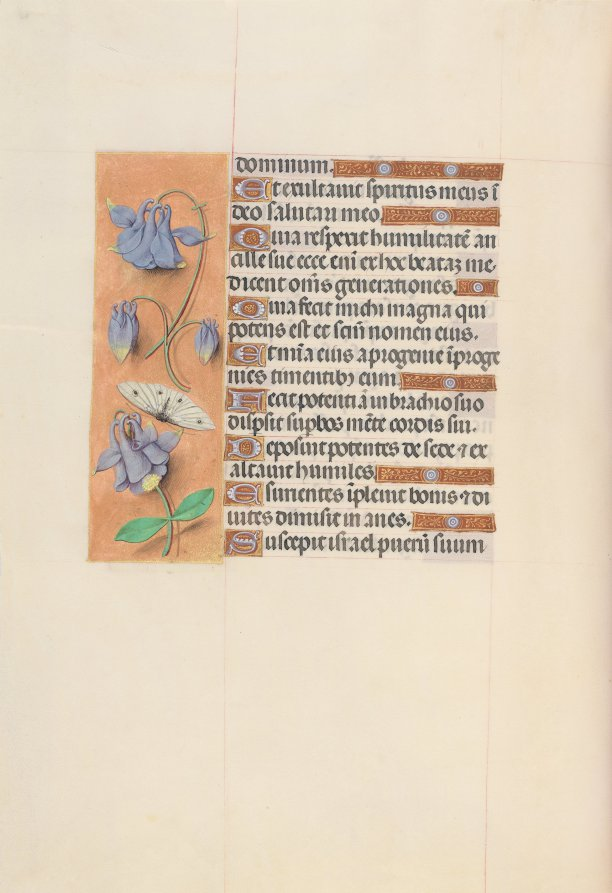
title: Hours of Queen Isabella the Catholic, Queen of Spain: Fol. 75v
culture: Flanders, Ghent and Bruges, late 15th century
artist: Master of the First Prayerbook of Maximillian (Flemish, c. 1444–1519)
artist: and Associates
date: c. 1500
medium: ink, tempera, and gold on vellum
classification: Bound Volume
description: This manuscript was illuminated by a circle of at least five highly organized manuscript painters active in the Flemish cities of Ghent and Bruges. The principal illuminator was Alexander Bening, who painted the majority of the book's miniatures. Manuscripts produced by this circle of artists are renowned for the decoration of their borders, which typically feature a rich variety of realistically-painted flowers, birds, and butterflies. This prayer book, called a book of hours, was intended not for a cleric, but for the private devotions of a lay person-in this case, Isabella the Catholic, Queen of Spain (1451-1504). Isabella's coat of arms embellishes the book's frontispiece. It is unlikely that the book was commissioned by the Queen herself; rather, she probably received it as a diplomatic gift from someone courting her patronage, perhaps Cardinal Francisco Jimenez de Cisneros. A Franciscan friar, Jimenez was dependent upon Isabella for his advancement, first to the post of Queen's confessor in 1492, and then to Archbishop of Toledo in 1495.